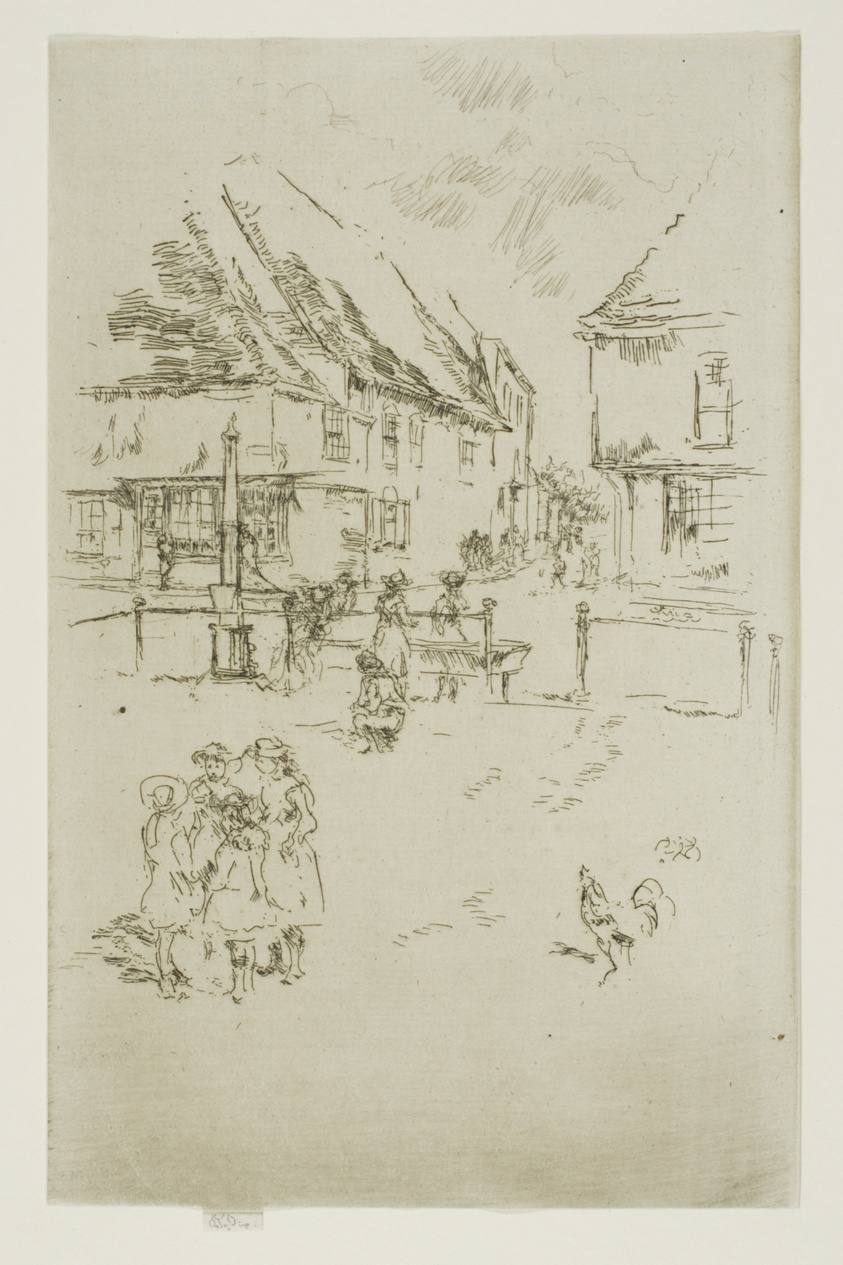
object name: Print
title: The Cock and the Pump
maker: James McNeill Whistler (American, 1834-1903)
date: 1887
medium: Etching with foul biting in black ink on ivory laid paper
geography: United States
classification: etching; foul biting; print; prints and drawing; paper